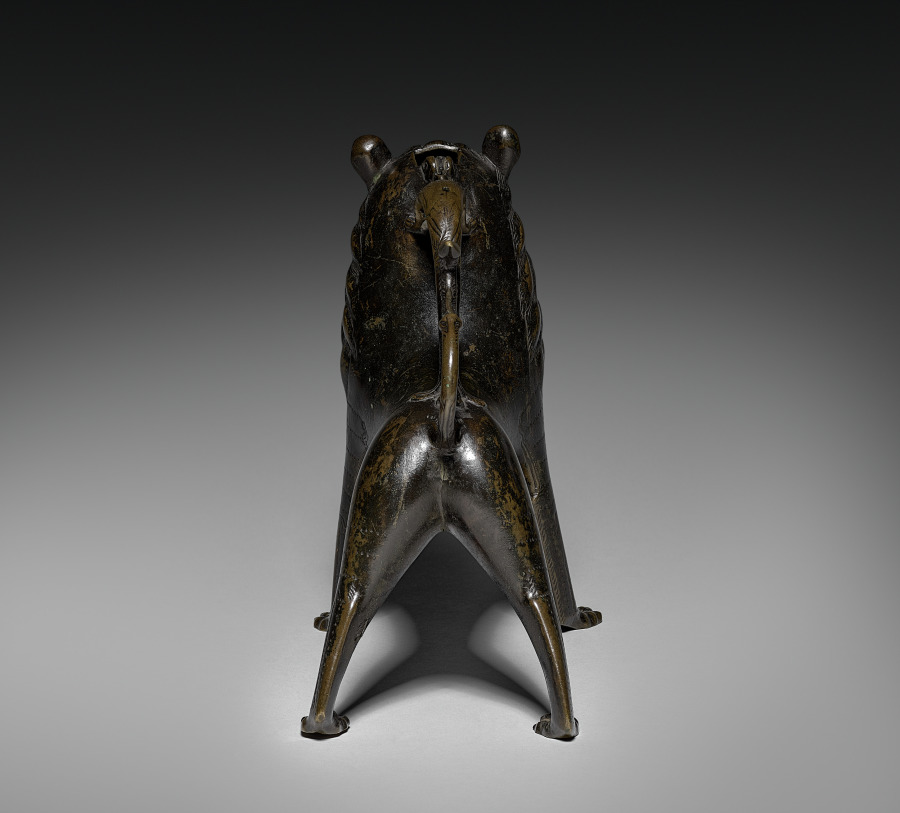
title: Lion Aquamanile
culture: Germany, Lower Saxony, Hildesheim, Gothic period, first half 13th century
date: 1200–1250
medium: bronze: cast, chased, and punched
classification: Sculpture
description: An aquamanile is a water vessel used for washing hands both at church altars and at the dinner tables of upper-class patrons. They often took the form of fantastic beasts such as dragons and unicorns or animals such as horses, birds, dogs, and lions, like this one.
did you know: The handle of this vessel is in the shape of a dragon with a long curving tail.